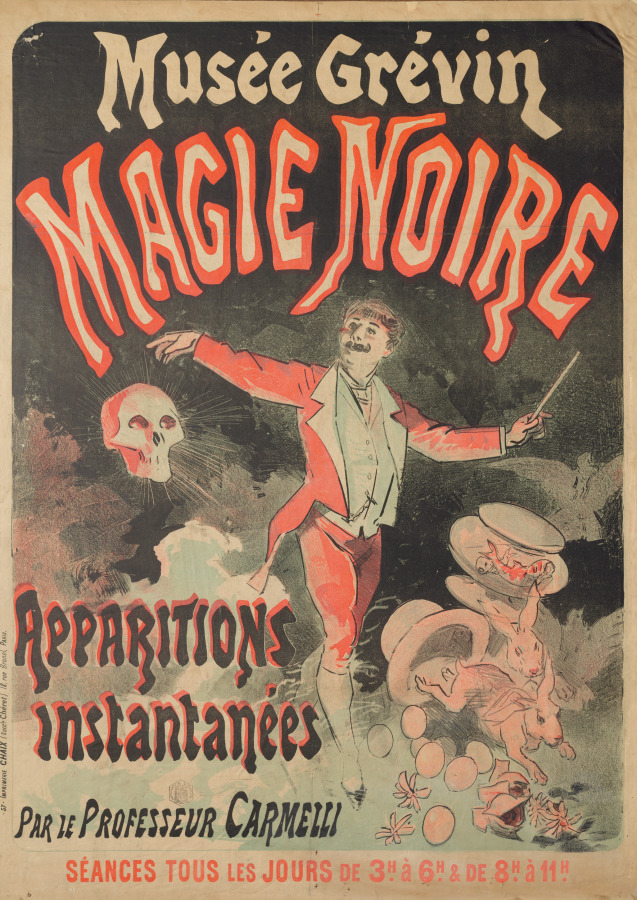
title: Musée Grévin, Black Magic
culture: France, 19th century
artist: Jules Chéret (French, 1836–1932)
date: 1887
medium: color lithograph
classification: Print